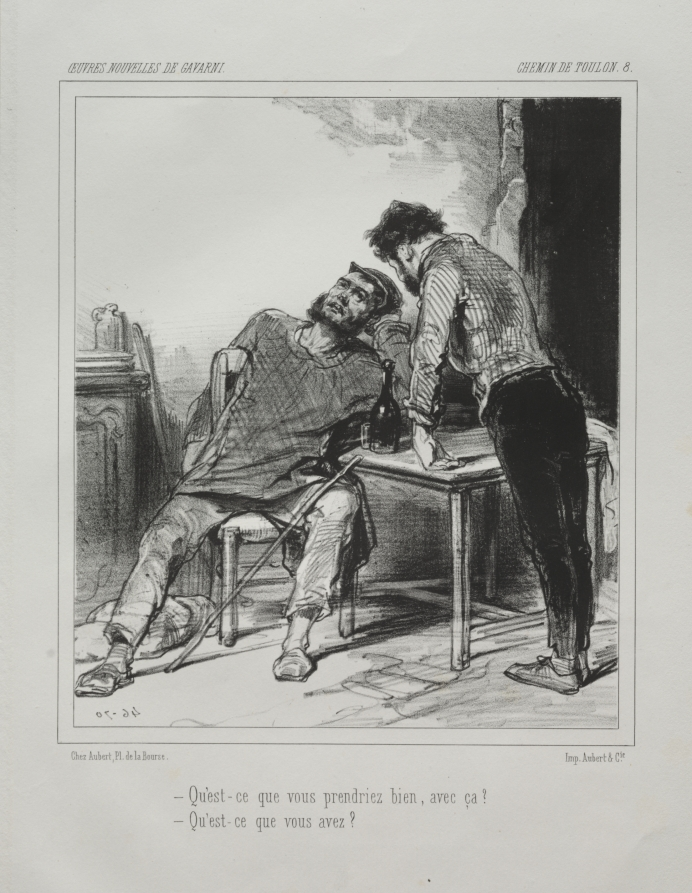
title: Chemin de Toulon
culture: France, 19th century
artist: Paul Gavarni (French, 1804–1866)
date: c. 1846–47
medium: lithograph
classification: Print